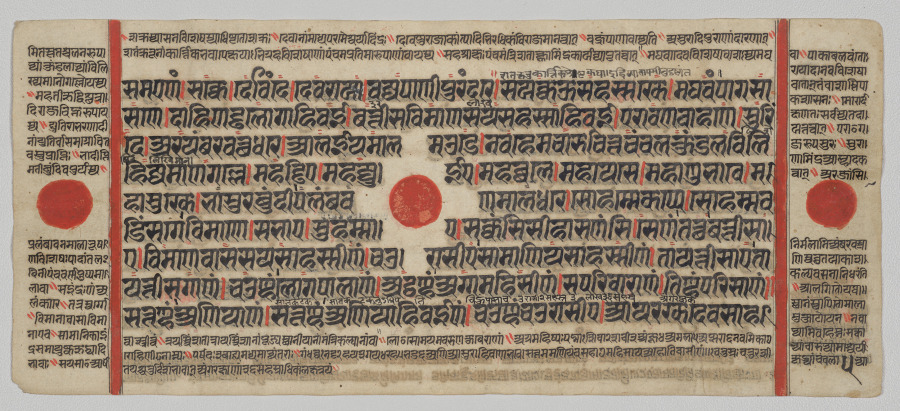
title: Text, Folio 5 (verso), from a Kalpa-sutra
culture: Western India, Gujarat, last quarter of the 15th century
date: c. 1475–1500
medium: Gum tempera, ink, and gold on paper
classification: Painting